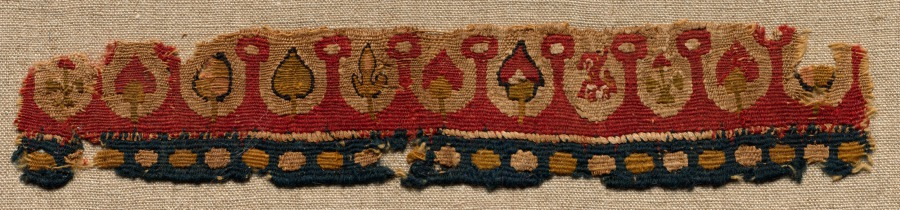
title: Fragment, Neck Band of a Tunic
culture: Egypt, Byzantine period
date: 400s - 600s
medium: tapestry (originally inwoven in tabby ground); wool and linen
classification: Textile